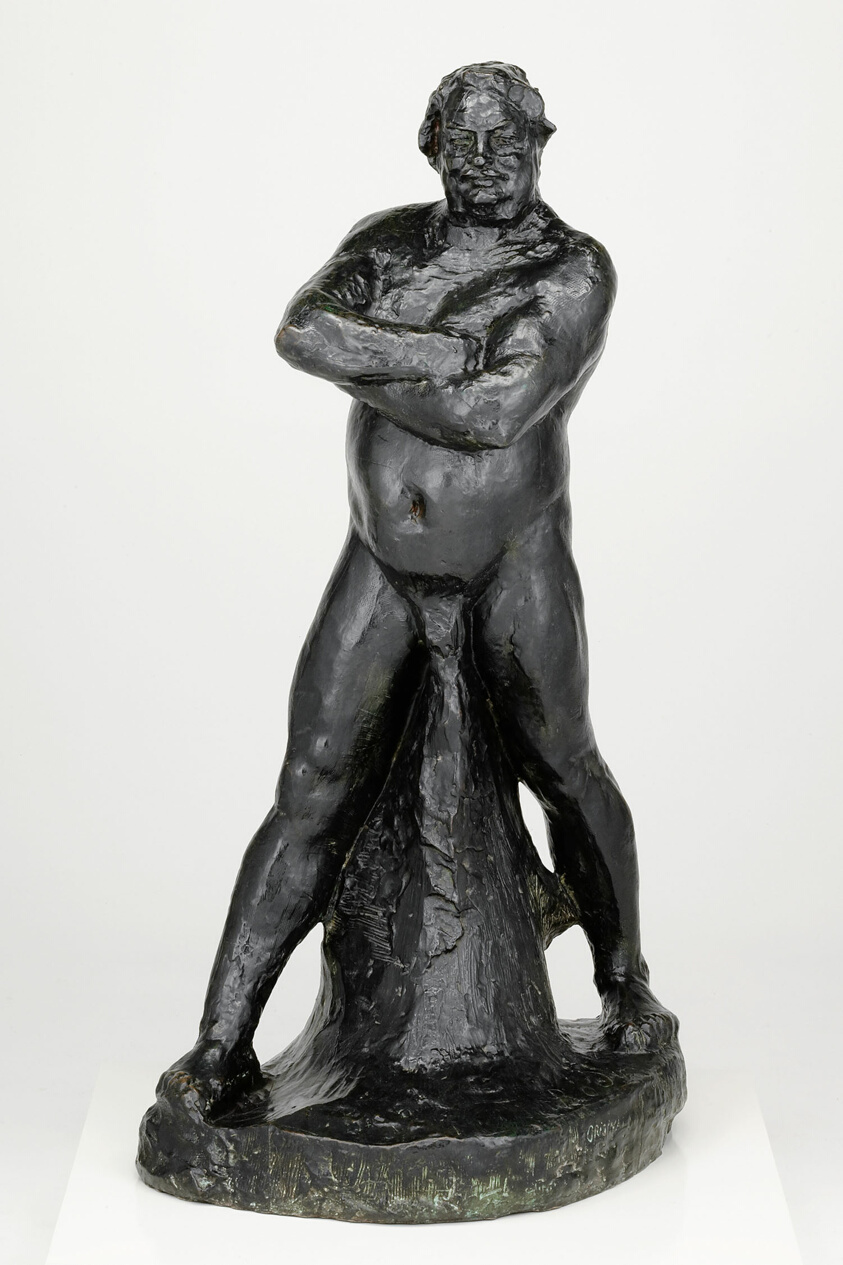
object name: Sculpture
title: Portrait of Balzac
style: Post-Impressionism, 19th century, 20th Century, nineteenth century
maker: Auguste Rodin (French, 1840–1917)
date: Modeled 1893, cast 1926–33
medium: Bronze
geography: France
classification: large scale; sculpture; bronze; french; portrait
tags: portraits: French subject, portraits, emotions, men, historical figures, writing, portraits: male subject, portrait, man